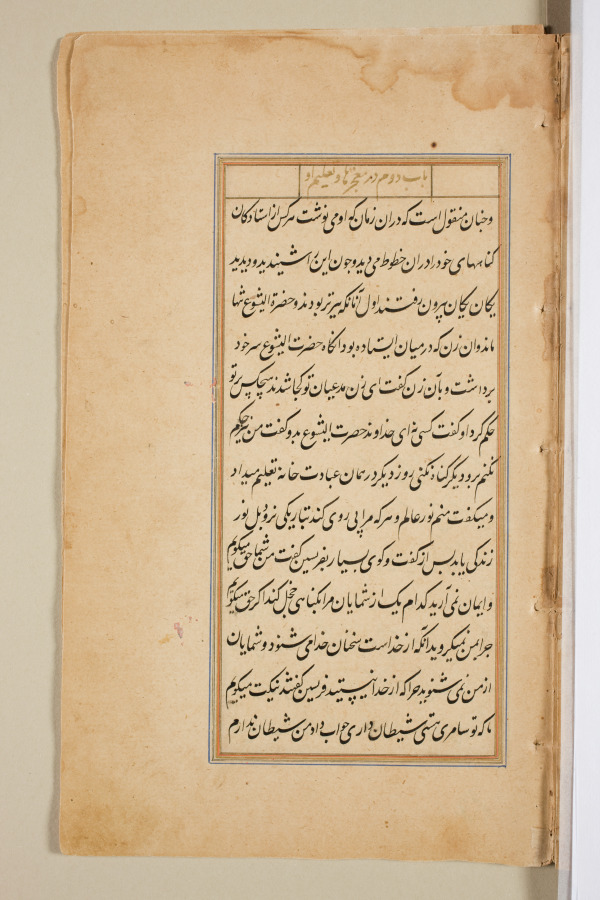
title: Text page from a Mirror of Holiness (Mir’at al-quds) of Father Jerome Xavier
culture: Mughal India, Allahabad, made for Prince Salim (1569–1627)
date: 1602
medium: Ink and gold on paper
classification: Manuscript